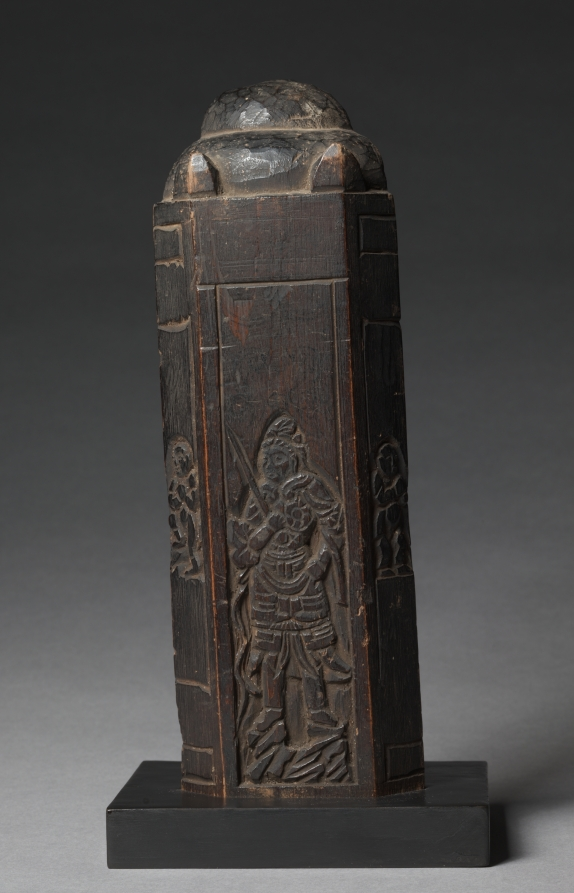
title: Wing of a Portable Shrine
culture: Japan, Heian period (794–1185)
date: 794–1185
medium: wood with lacquer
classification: Sculpture